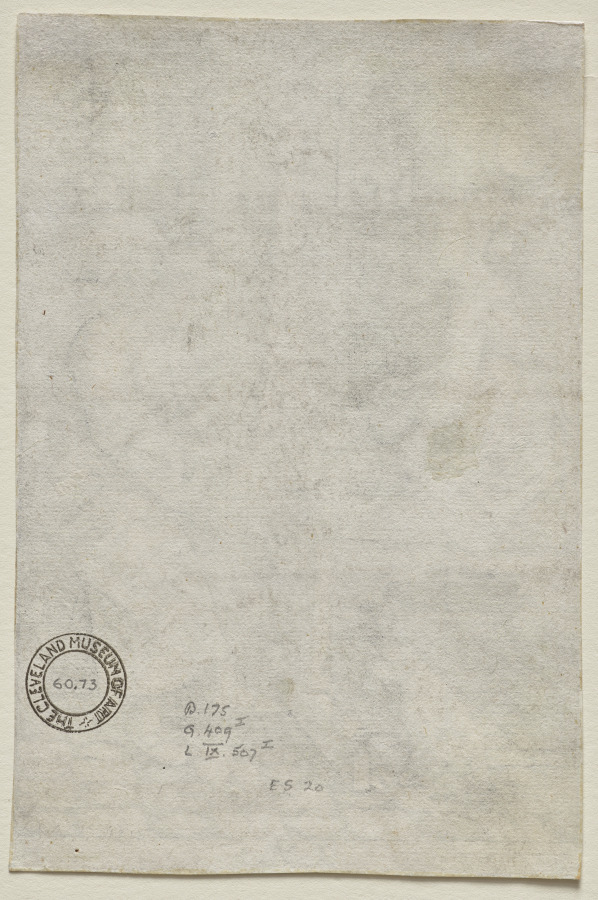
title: The Organ Player and His Wife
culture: Germany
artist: Israhel van Meckenem (German, c. 1440–1503)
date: 1495–1500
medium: engraving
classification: Print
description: In a cozy, domestic setting, an organ player plays a portative with four registers. His wife operates the two bellows, producing the wind that gives the instrument its sound. The activity of one would be inconceivable and pointless without the other. The music they create together--as well as the faithful dog placed prominently in the foreground--refers to marital harmony.